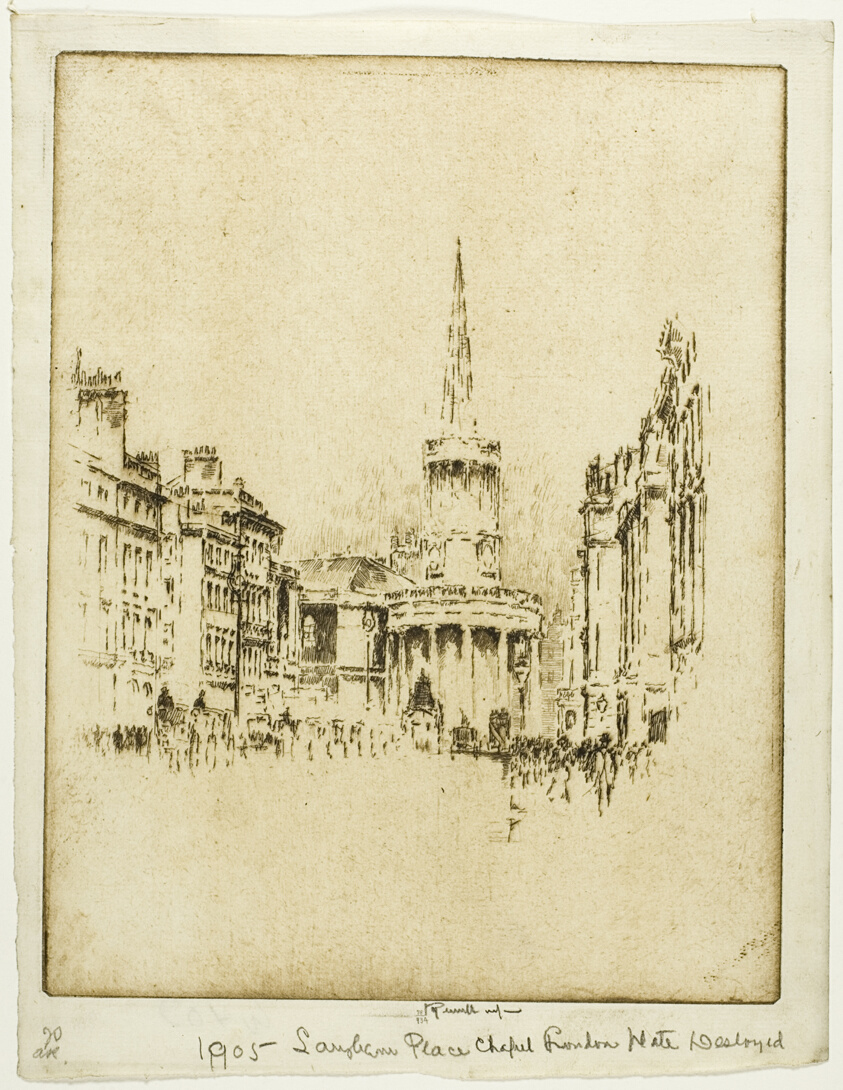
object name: Print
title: Langham Place Chapel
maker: Joseph Pennell (American, 1857-1926)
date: 1906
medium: Etching in brownish ink on ivory laid paper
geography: United States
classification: etching; print; prints and drawing